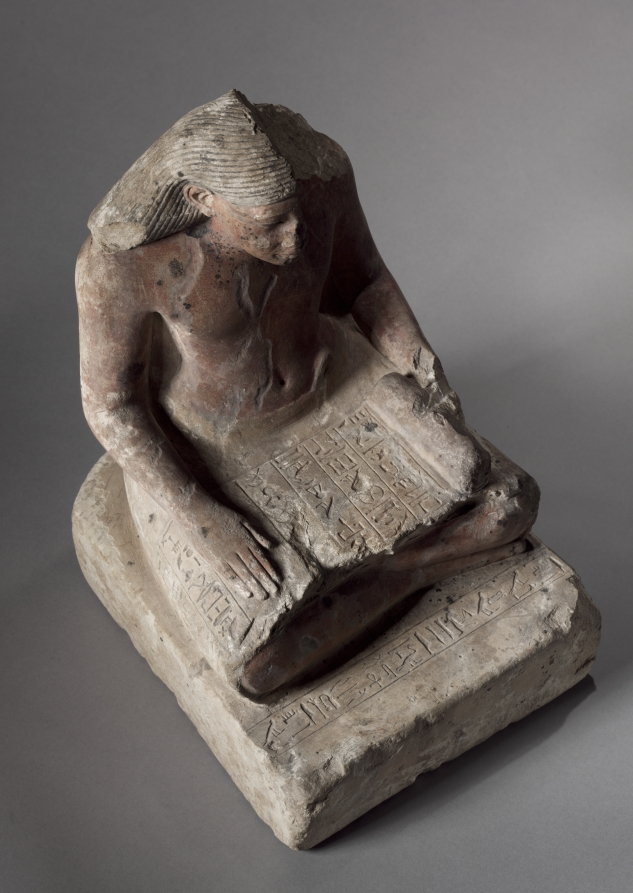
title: Seated Scribe of Medthu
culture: Egypt, New Kingdom (1540–1069 BCE), Dynasty 18, reign of Tuthmosis III (1479–1425 BCE)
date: c. 1479–1425 BCE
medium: limestone, originally painted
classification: Sculpture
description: Medthu, the overseer of the two granaries and scribe of accounts of the fields of Amen, sits cross-legged on the ground in the traditional pose of a scribe. His striated, bell-shaped wig, the stripes of which run parallel to his forehead, completely reveals his ears and passes behind his shoulders. His short, belted kilt is stretched tight to support he papyrus that is partly unrolled across his lap. He holds the rolled-up portion with his left hand, and his right hand rests flat on the papyrus, which curls around his right thigh. The papyrus is inscribed in sunk relief with seven columns of hieroglyphs that face the scribe. The Middle Kingdom type of wig helps date the statue more closely to the earlier part of Dynasty 18, around the time of Tuthmosis III. Later in Dynasty 18 the coiffure was fashionably updated.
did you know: The scribe statue has a long and distinguished history, having first appeared in Dynasty 4 (c. 2613 to 2494 BC).